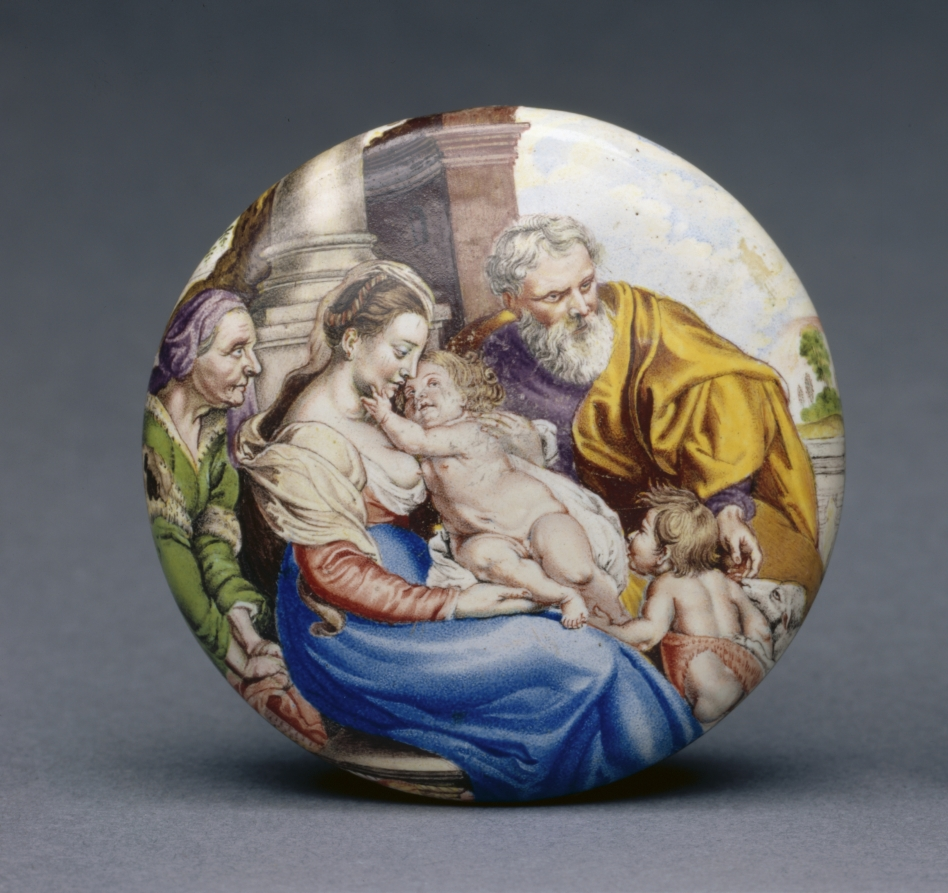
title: Watchcase (Boîtier de montre)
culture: France, 17th century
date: c. 1640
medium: gold and enamel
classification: Jewelry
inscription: [engraved on the rim]: "B8"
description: In the 1630s, the practice of painting with enamel on metal became a means for French miniature painters to achieve a more richly colored, durable product. Previously miniatures were painted with watercolor on vellum, a material made from animal skin. This case would have originally held a watch, but was later transformed into a simple box through the removal of the watch mechanism and ring. This watch case is richly painted inside and out with miniatures modeled after well-known religiously allegorical works.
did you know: Inspiration for the box’s miniatures was drawn from works by Peter Paul Rubens’ The Holy Family with Saints John the Baptist and Elizabeth (1615) (back panel) and Nicolas Cochin (interior base).